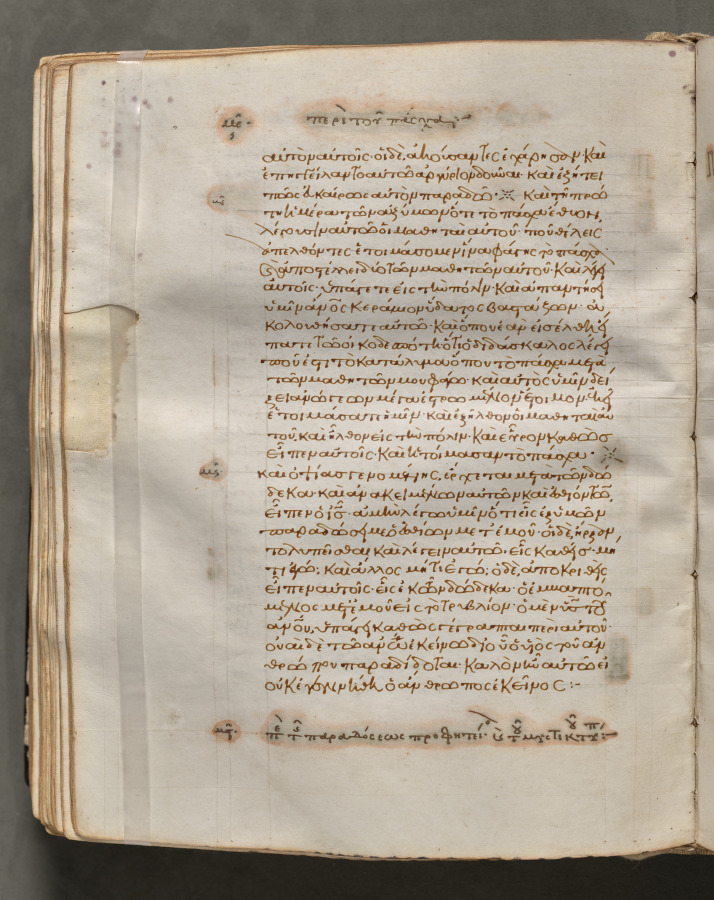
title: Text, folio 187 (verso), from a Gospel Book with Commentaries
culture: Byzantium, Constantinople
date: c. 1000–1100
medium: ink, tempera, and gold on vellum; leather binding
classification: Bound Volume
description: Each of the four gospels in this book opens on a page with brilliantly illuminated borders depicting the author of the text as well as birds-principally peacocks, symbols of the immortality of the soul-and fountains, representing the fountain of life and the salvation of the soul. This volume consists of 428 leaves with texts in Greek. Its level of sophistication suggests that it was probably written and decorated in a monastery in Constantinople.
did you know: Gospel Books were carried in procession through Byzantine churches.